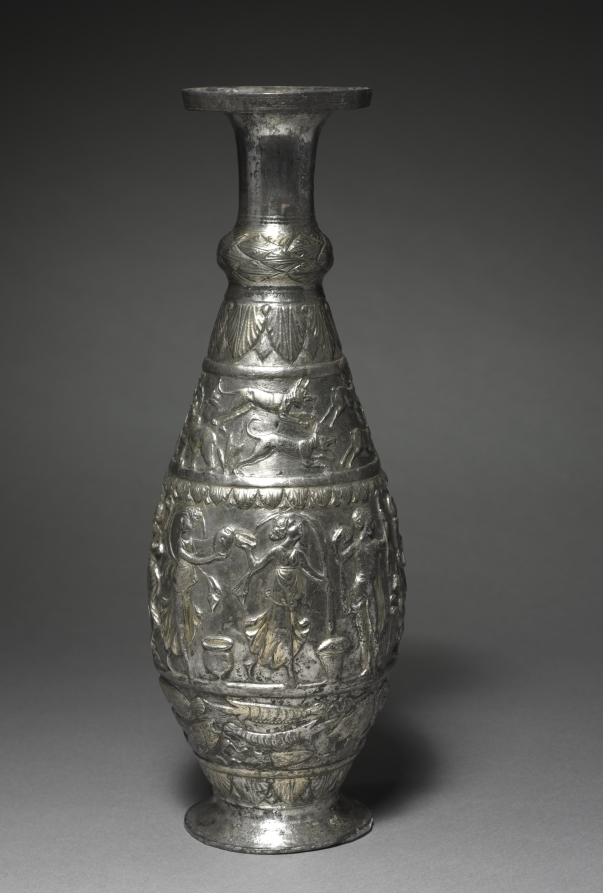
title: Ewer (Pitcher) with Game, Seafood, and Wine Scenes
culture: Byzantium, Syria(?), Byzantine period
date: late 300s CE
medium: silver with traces of gilding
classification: Metalwork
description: This magnificent pitcher, called a ewer, was almost certainly meant for serving wine in the dining room of a wealthy home. On its surface are images in three bands representing the expected bounty of the hunt. Deer pursued by a lioness and hares chased by dogs appear in the top band, signifying the wealth of game the owner hoped to have on the family table. In the lowest band are edible sea creatures, while the center features the merry followers of the Roman wine god Bacchus (Dionysos in Greek).